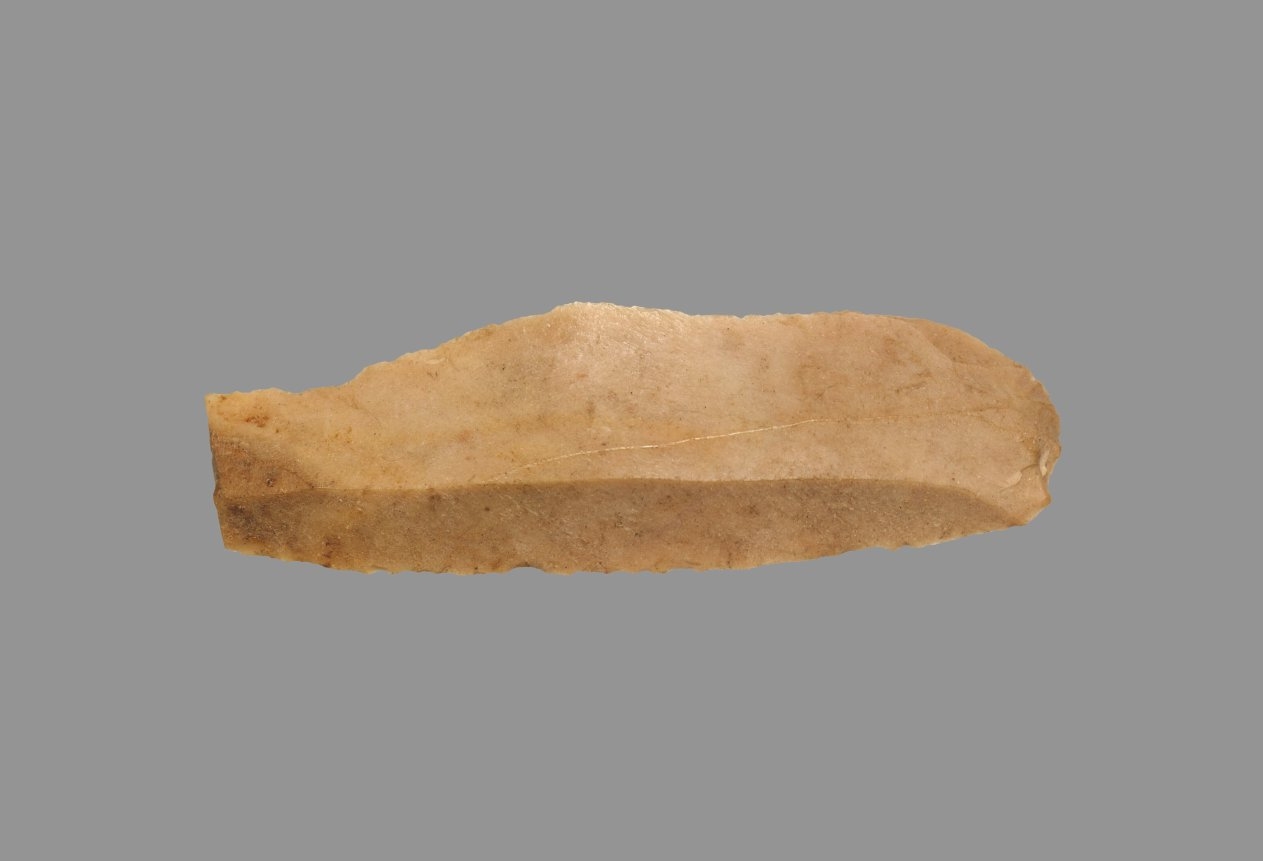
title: Sickle Blade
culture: Egypt, Middle Kingdom (2040–1648 BCE), Dynasty 12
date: 1980–1801 BCE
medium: flint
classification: Implements